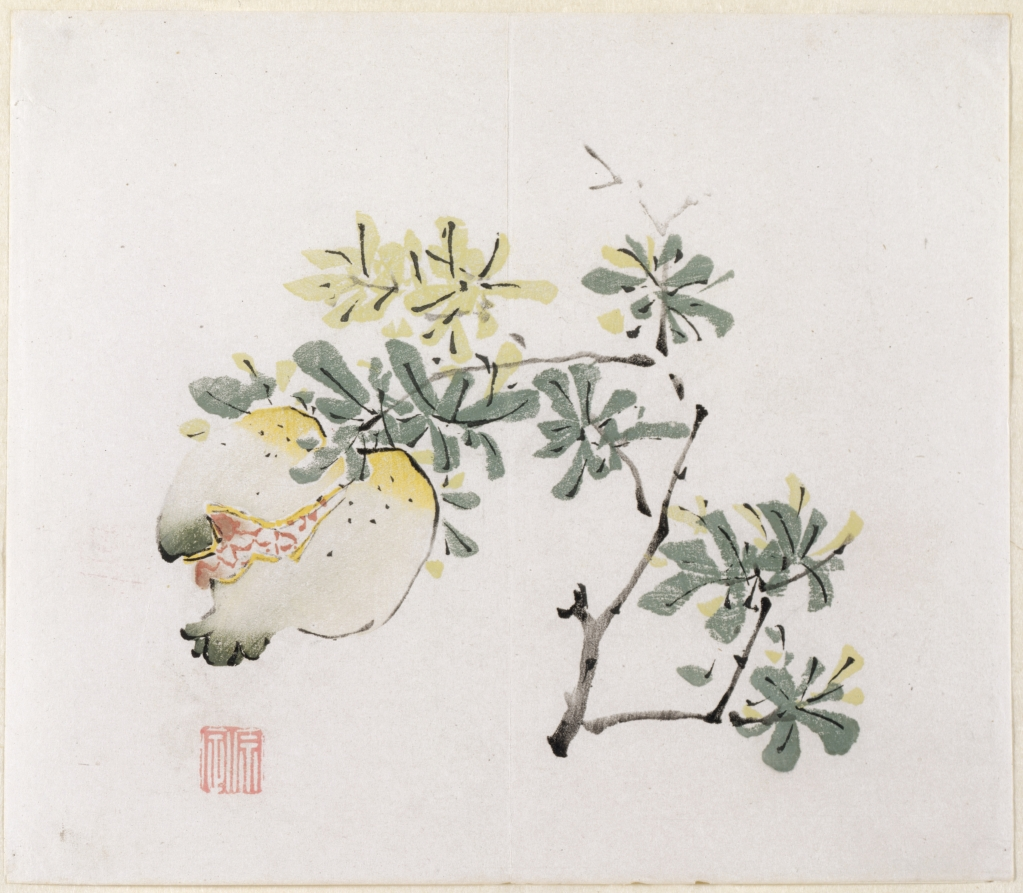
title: Branch with Pomegranate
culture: China, Qing dynasty (1644-1911)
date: 18th Century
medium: color woodblock print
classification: Print